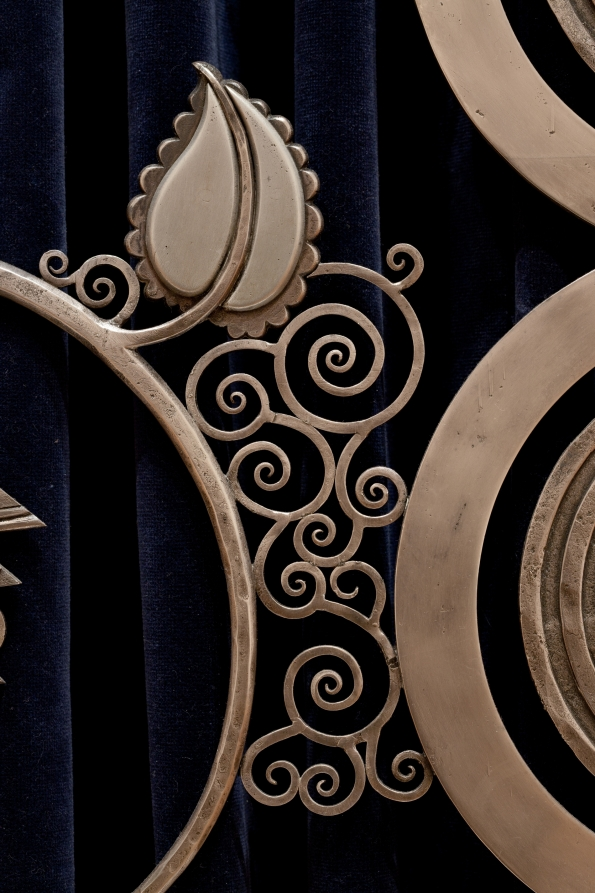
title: Muse with Violin Screen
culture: America, Ohio, Cleveland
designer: Paul Fehér (American, born Hungary, 1898–1990)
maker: Rose Iron Works (America, Ohio, Cleveland, est. 1904)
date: 1930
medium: Steel, brass; silver and gold plating, cotton velveteen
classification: Metalwork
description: Since the early years of the 20th century, the Rose Iron Works, a Cleveland supplier of architectural ornament, has produced distinguished metalwork. The company’s founder, Martin Rose, was born in Austria-Hungary and studied ornamental metalsmithing in Vienna prior to immigrating to Cleveland in 1902. In the 1920s, he hired a talented young Parisian designer, Paul Fehér, to work for the firm. Fehér’s designs, culminating in this massive screen, brought a modern European sensibility to the Rose Iron Works production. With its geometric patterning, highly stylized and abstracted natural forms, and the central figure reminiscent of the celebrated jazz singer Josephine Baker, this screen reflects the classic motifs of Art Deco design.